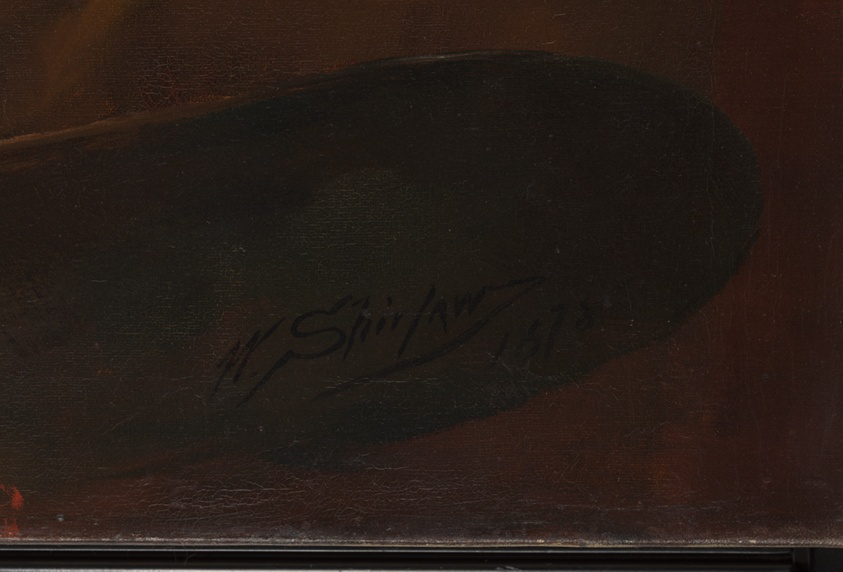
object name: Painting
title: Self-Portrait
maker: Walter Shirlaw (American, 1838–1909)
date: 1878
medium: Oil on canvas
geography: United States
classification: painting; american arts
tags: self-portraits